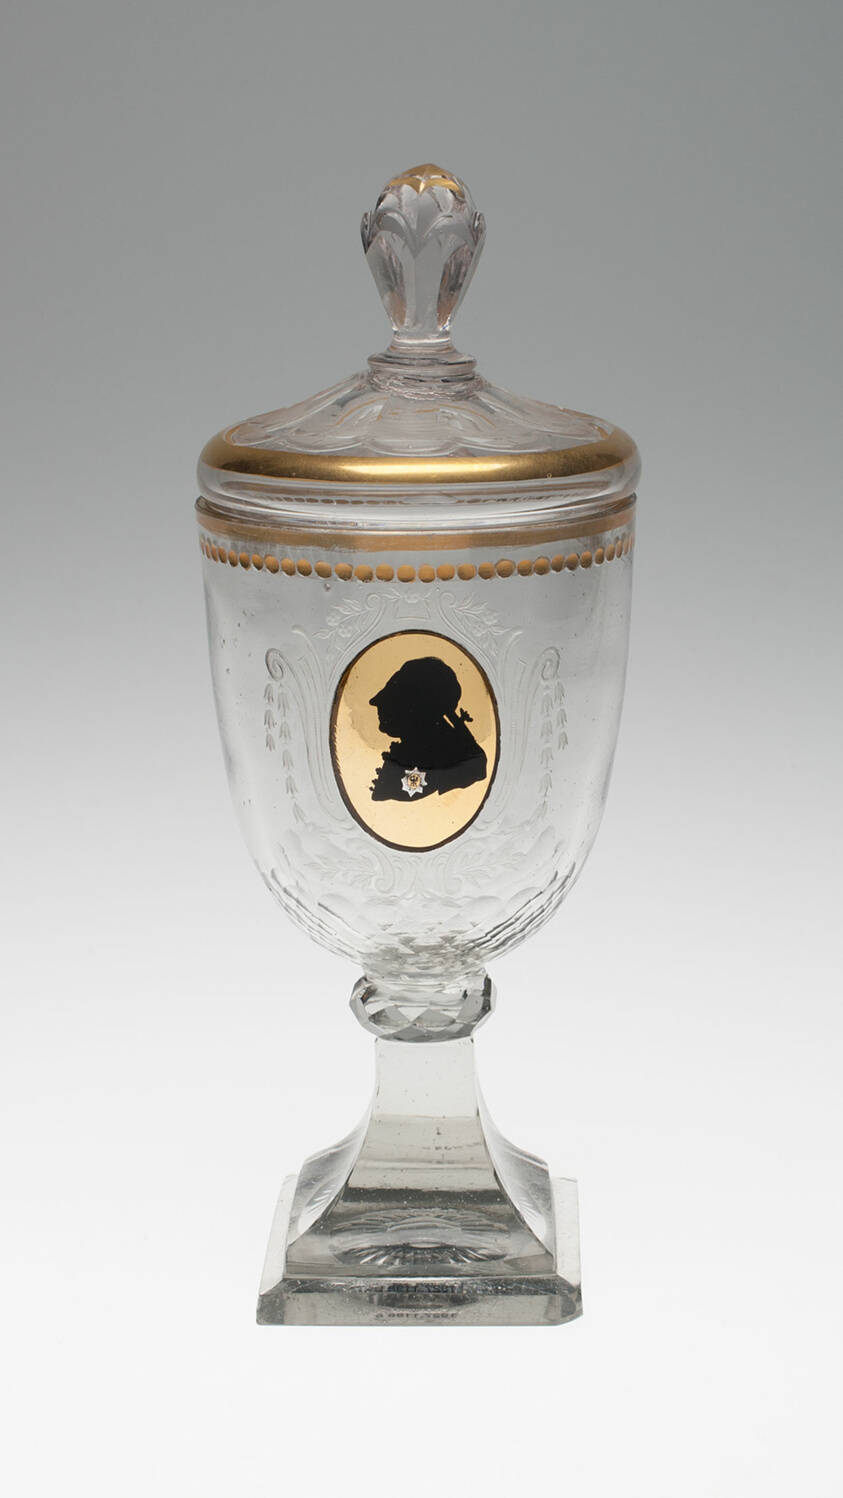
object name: Glass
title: Covered Goblet with Silhouette Bust of King Frederich the Great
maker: Germany, Silesia, Warmbrunn; Decorated by Johann Sigismund Menzel (German, 1744-1810)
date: c. 1795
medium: Glass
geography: Germany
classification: drinking vessel; glass; european decorative arts